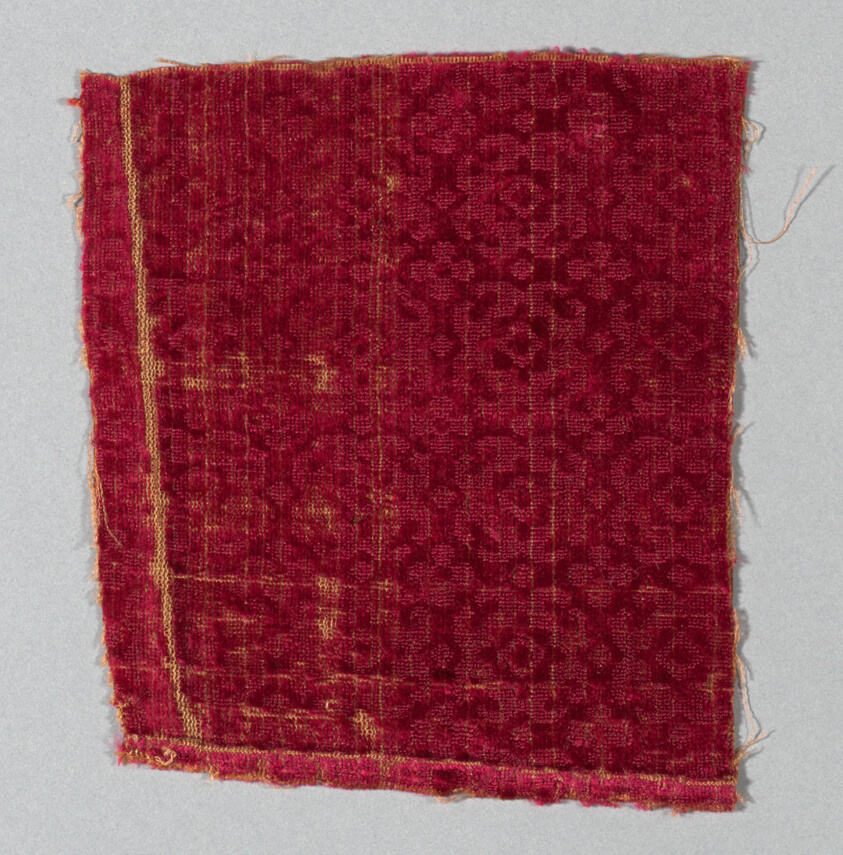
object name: Textile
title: Fragment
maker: Italy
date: late 18th century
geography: Italy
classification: textile; weaving - velvet; weaving